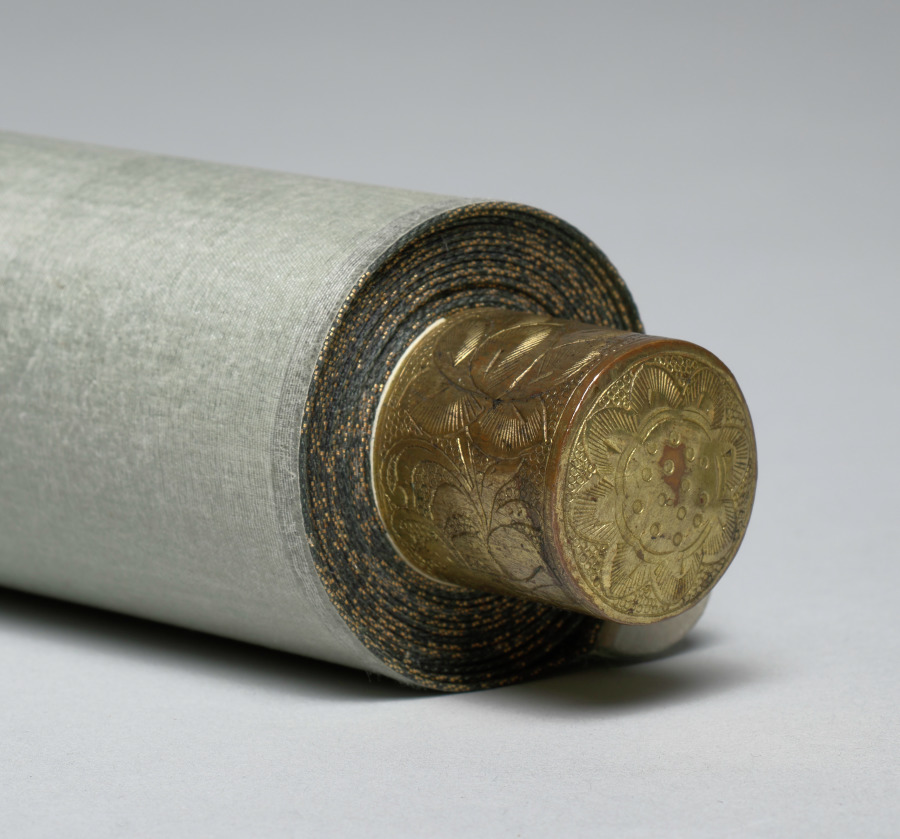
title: Portrait of Priest Dazhi (1048–1116), Master of Law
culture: China, Southern Song dynasty (1127-1279)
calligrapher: Liu Tao (Chinese, late 1000s–early 1100s)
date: 1100s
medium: Hanging scroll; ink and light color on silk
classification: Painting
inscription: Inscription by Liu Tao (late 1000s–early 1100s): Dignified with the perfection of the upasampada,/ His appearance is like his mind;/ Uncompromising and loftily aloof,/ His mind is like his appearance./ To say he is square, he proves to be round;/ He looks timid, yet his spirit is unbound./ Having no attachment, and holding no reins,/ Man and deities alike take refuge in him. (Translation by WKH, 1980)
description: Monk Yuanzhao, with the honorific title Dazhi Lüshi, Great Wisdom Master of Vinaya, is depicted here as an itinerant monk, holding his alms bowl in the left and staff in the right. In 1142, Emperor Gaozong had bestowed Yuanzhao with a posthumous title, mentioned in the inscription, which suggests that the portrait was made after the master’s death. A master of the Lü sect of Buddhism, with a calm benevolent smile on his face, Yuanzhao was active on Mount Tiantai and in Hangzhou. Later, Liu Tao, a southerner from Changxing, added the inscription. The eulogy reads: Dignified he is, perfect in his upasampada [ordination of a monk]. His appearance is like his mind. Uncompromising and aloof. His mind is like his appearance. To say he is square, he proves to be round. He looks timid, yet his spirit is unbound. Having no attachment, and holding no reins, men and deities alike take refuge in him. —translated by Wai-Kam Ho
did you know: A native of Hangzhou, the priest Dazhi was known for his eloquent exposition of Buddhist doctrines and for his success in winning many converts.